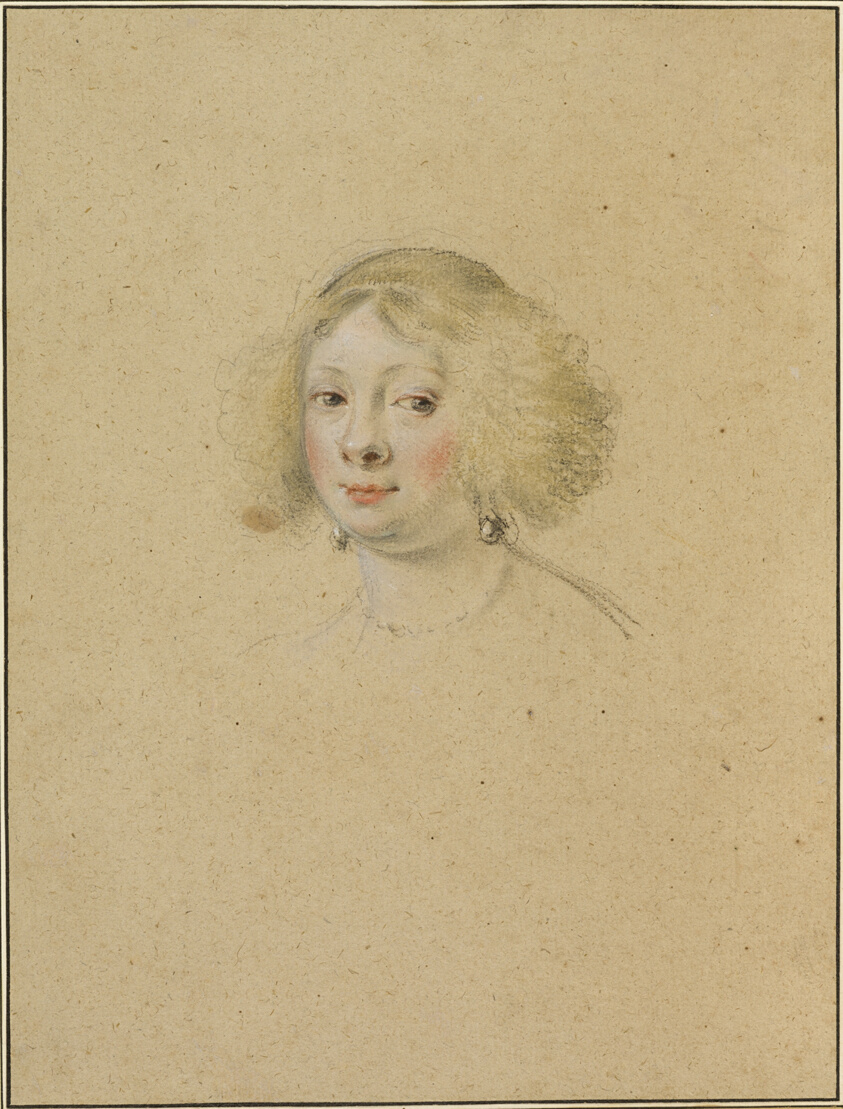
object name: Drawing and Watercolor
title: Portrait of a Young Woman with Pearl Earrings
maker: Simon Vouet (French, 1590-1649)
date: 1632/35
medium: Black chalk and pastel, heightened with white chalk, on light brown laid paper, laid down on an eighteenth-century mount with framing lines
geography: France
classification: chalk; paper; prints and drawing